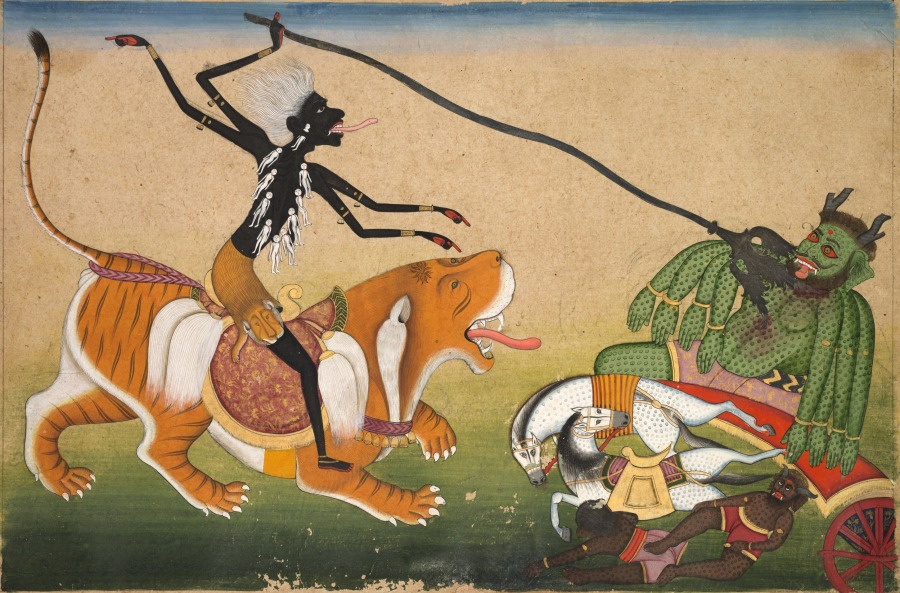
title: Kali attacking Nisumbha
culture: Northern India, Pahari kingdoms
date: c. 1740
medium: Gum tempera and gold on paper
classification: Painting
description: The powerful black Hindu goddess Kali effortlessly slays an eight-armed spotted green demon with an impossibly long trident. His chariot horses and two minions lie incapacitated below. Kali’s tongue lolls out, indicating her ability to catch blood before it touches the ground: one of her demonic enemies has blood that generates another demon every time one drop comes in contact with the earth. The demon is a metaphor for wicked thoughts that give rise to more evil thoughts; Kali aids her followers in eradicating them all.